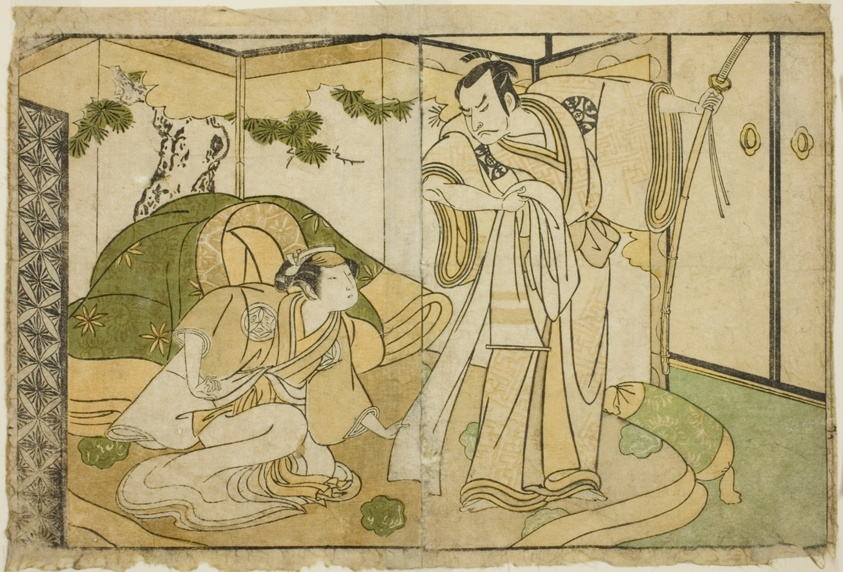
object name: Print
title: The Actors Nakamura Nakazo I as Taira no Kiyomori (right), and Yamashita Kinsaku II as Tokiwa Gozen (left), in the Play Nue no Mori Ichiyo no Mato, Performed at the Nakamura Theater in the Eleventh Month, 1770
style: Japanese (culture or style)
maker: Katsukawa Shunsho 勝川 春章; Japanese, 1726-1792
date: c. 1772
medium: Color woodblock print; from the illustrated book Yakusha Kuni no Hana (Prominent Actors of Japan)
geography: Japan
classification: woodblock print; print; asian art